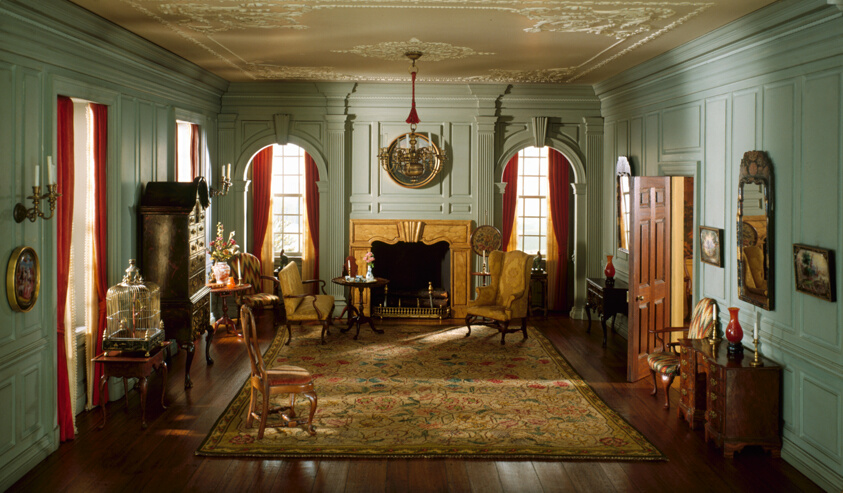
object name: Miniature room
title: A23: Virginia Drawing Room, 1754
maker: Designed by Narcissa Niblack Thorne; American, 1882-1966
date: c. 1940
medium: Miniature room, mixed media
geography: United States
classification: miniature; thorne rooms